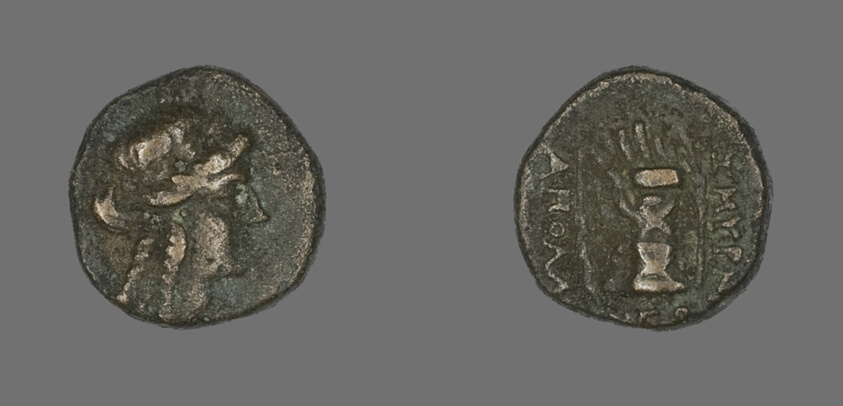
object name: Coin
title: Coin Depicting the God Apollo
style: greek, ancient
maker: Greek, minted in Smyrna, Ionia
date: 2nd-1st century BCE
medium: Bronze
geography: Ancient Greece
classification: coin; ancient art